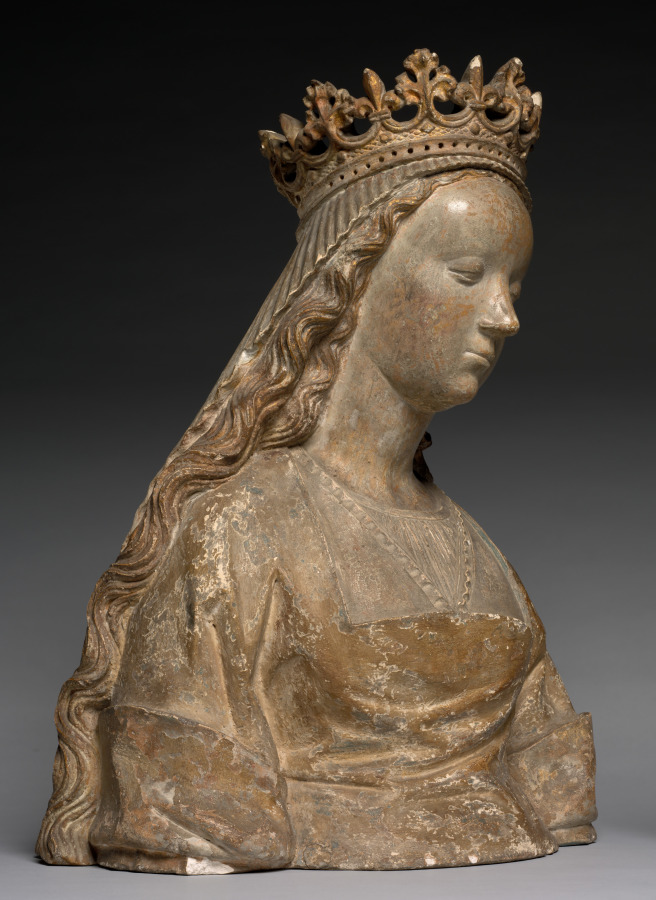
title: Bust called Anne de Bretagne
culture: France, 16th century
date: c. 1500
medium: stone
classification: Sculpture